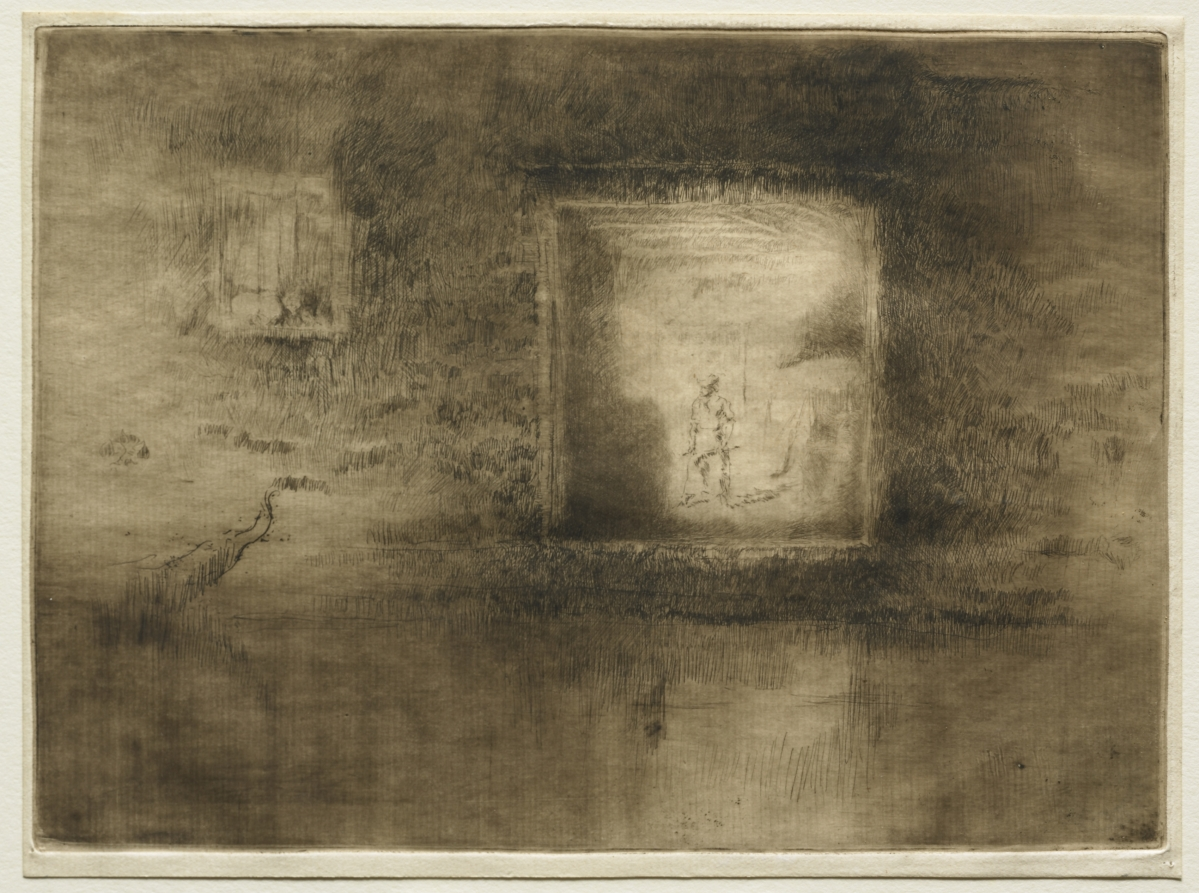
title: Nocturne: Furnace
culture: America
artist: James McNeill Whistler (American, 1834–1903)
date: 1886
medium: etching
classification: Print